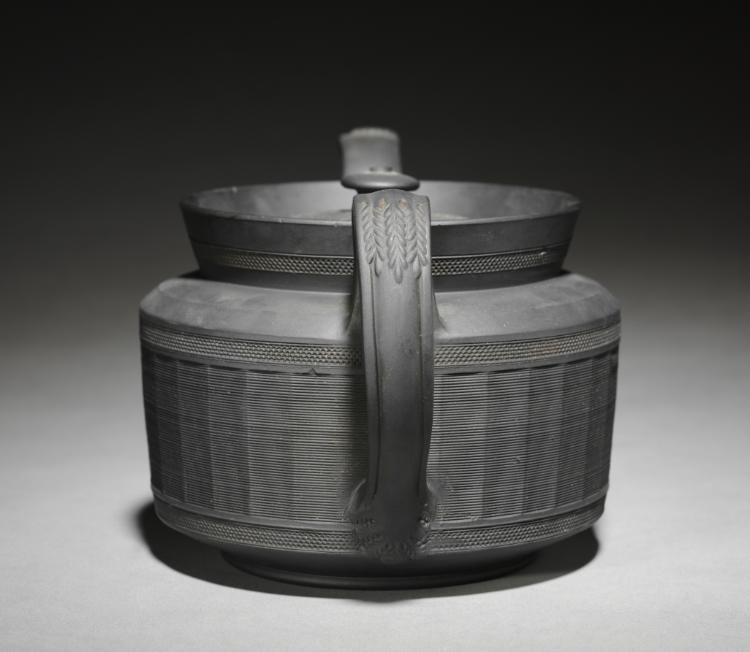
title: Teapot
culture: England, Staffordshire, 19th century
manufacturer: Davenport Pottery and Porcelain Factory (British)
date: 1800s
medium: black basalt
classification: Ceramic